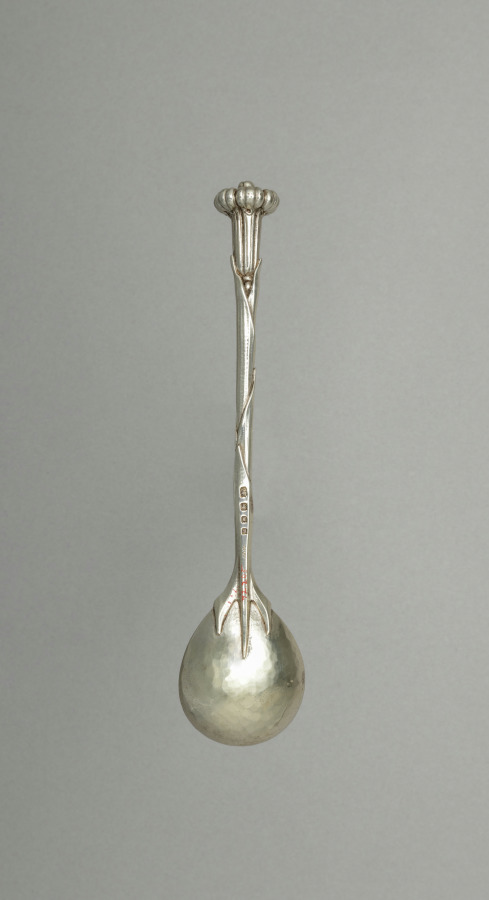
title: Caviar Spoon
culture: England, 20th century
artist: Omar Ramsden (British, 1873–1939)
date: 1930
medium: silver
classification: Silver